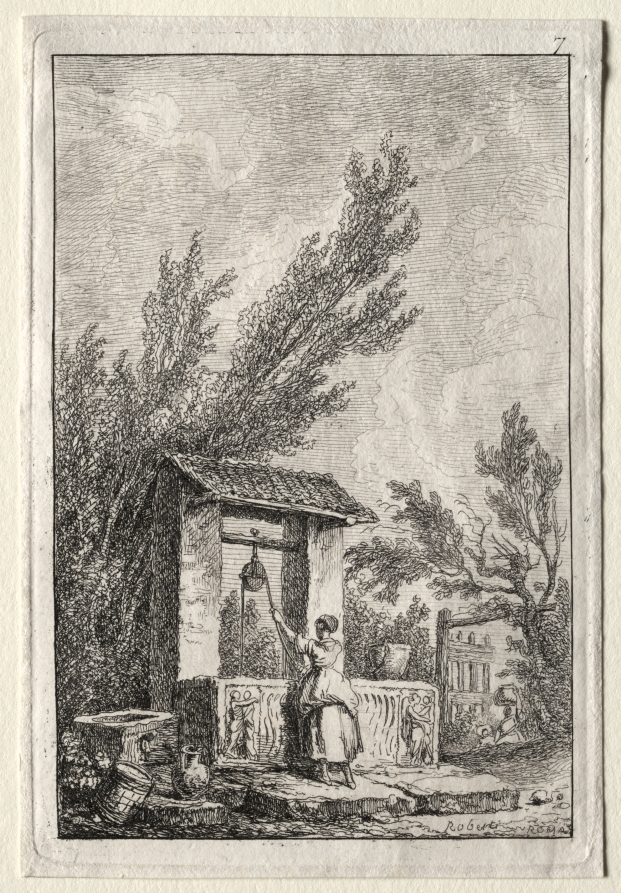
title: Le Puits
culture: France, 18th century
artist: Hubert Robert (French, 1733–1808)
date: 1763–64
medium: etching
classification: Print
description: Derived from his own pen-and-ink drawings, this suite of etchings features fictional characters situated near recognizable buildings and statues in Rome. On the title page, Robert dedicated the suite to Marguerite Le Compte, who visited Rome in 1764 in the company of the wealthy author and art enthusiast Claude Henri Watelet. Both Le Compte and Watelet were amateur etchers, and they socialized with a group that included artists and printmakers centered at the academies in Italy. Robert’s dedication was likely motivated by the hope of future patronage from Le Compte. She may be the generous woman with a hand muff depicted in The Ancient Temple, the fifth scene in this series.